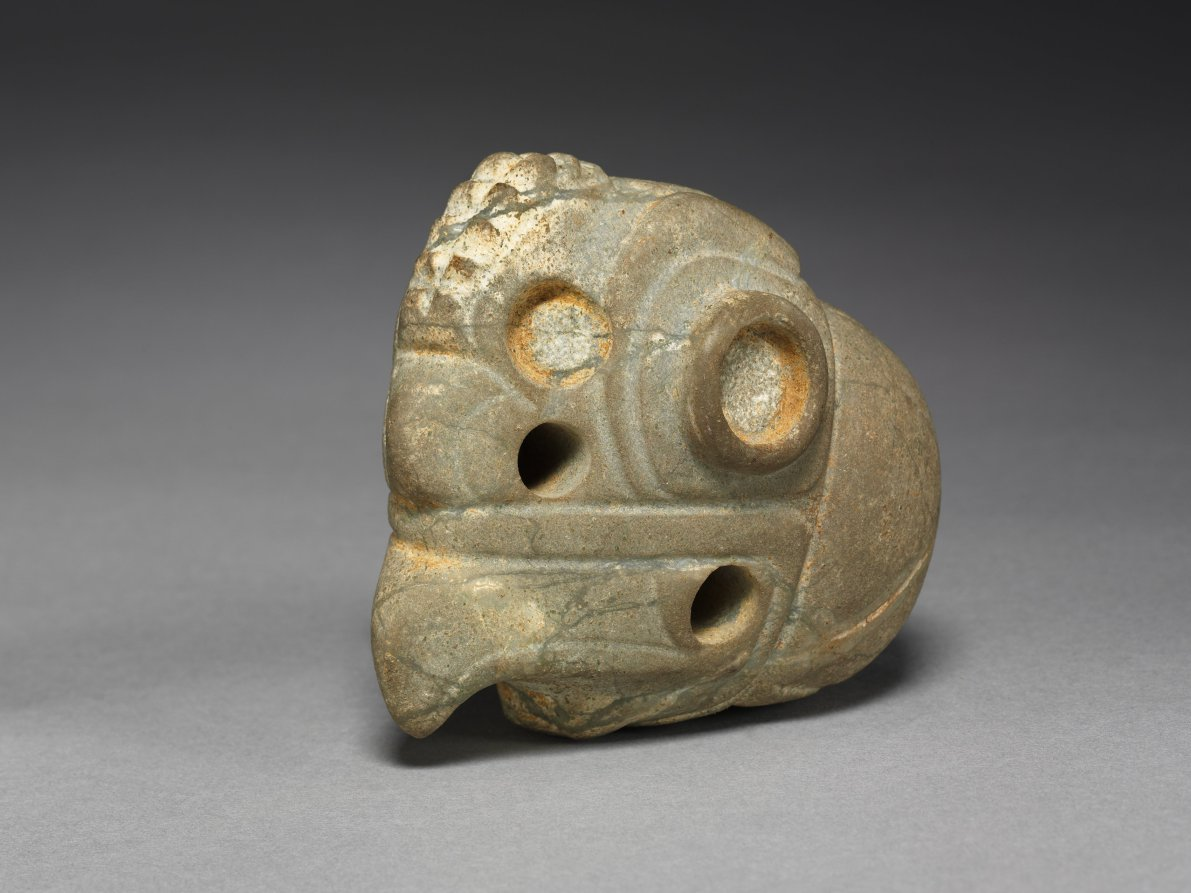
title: Ceremonial Mace (Club) Head: Bird (Male Curassow?)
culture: Costa Rica, Southern Nicoya region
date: 300 BCE–600 CE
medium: stone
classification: Sculpture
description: Probably once mounted on wooden shafts, these objects could have served as symbols of chiefly authority, group insignia, the heads of ceremonial weapons, or all three. They eventually were placed in elite graves. The bird may be a male curassow and the feline, a jaguar.